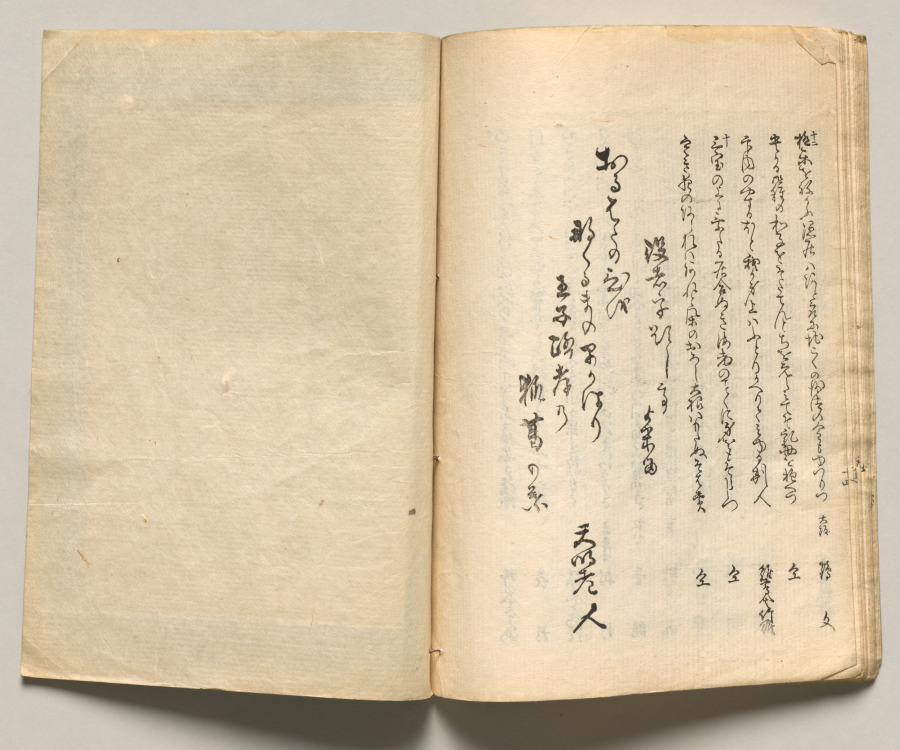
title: Spread Twenty-One from Volume Five of People of Japan in Light Verse (Kyōka)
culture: Japan, Edo period (1615–1868)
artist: Utagawa Hiroshige (Japanese, 1797–1858)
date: 1857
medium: Woodblock-printed book; ink and color on paper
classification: Bound Volume